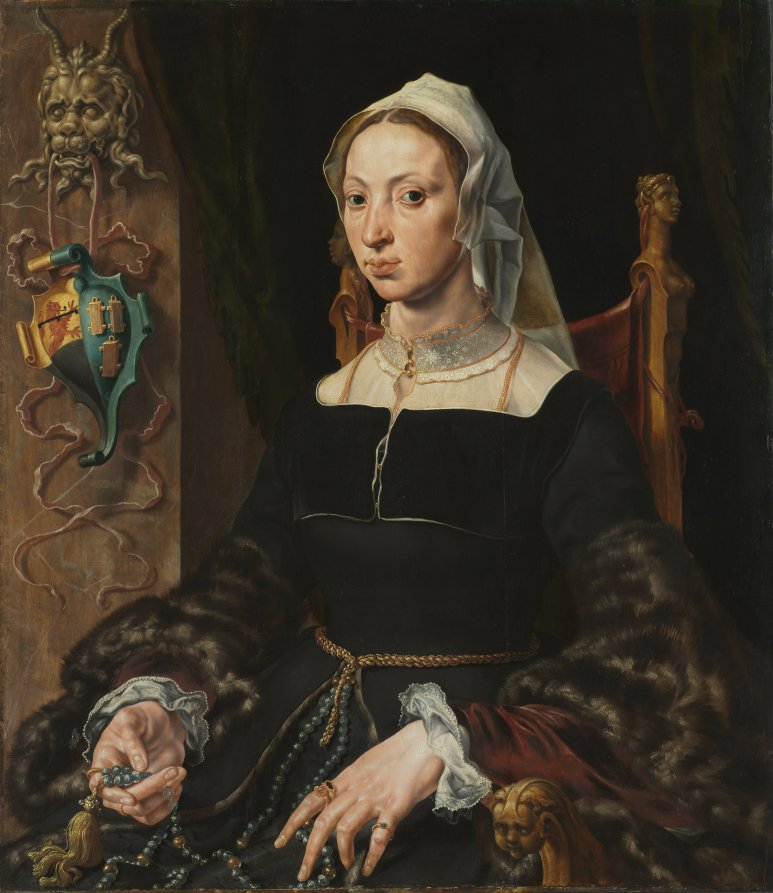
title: Portrait of Machtelt Suijs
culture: Flanders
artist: Maerten van Heemskerck (Dutch, 1498–1574)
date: c. 1540–45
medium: oil on wood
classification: Painting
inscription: note on cradle appears on a notation in chalk (originally) slightly scratched faintly letters " Mr A.M.C [?] or K [?] Reyve"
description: Maerten van Heemskerck lived in Rome for four years (1532–36) and was deeply affected by the city's art and antiquities. Here, the half-length, seated figure, the tense yet elegant hands, and even the grotesque classical mask reflect the impact of that experience, while the love of meticulously represented textures is traditionally associated with northern European art. Machtelt Suijs married Dirick van Teijlingen in 1535 and lived in Alkmaar (the Netherlands), where Heemskerck must have painted her. The coat-of-arms that hangs from the mask combines family emblems, indicating that her portrait must have been accompanied by one (now lost) of her husband.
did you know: The coat of arms depicts golden pile drivers, indicating the family construction business.